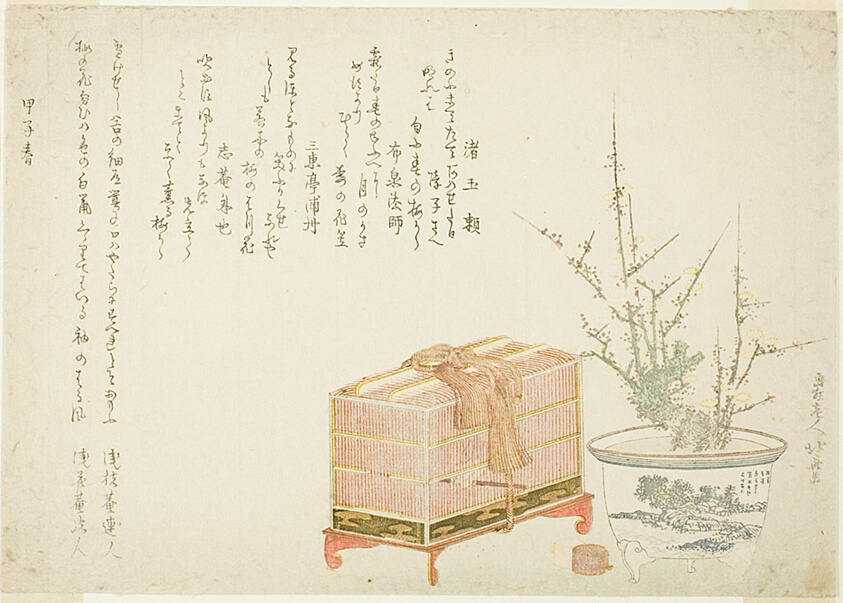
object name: Print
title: Bird Cage and Potted Plum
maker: Katsushika Hokusai 葛飾 北斎; Japanese, 1760-1849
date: 1804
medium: Color woodblock print; surimono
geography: Japan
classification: woodblock print; print; asian art